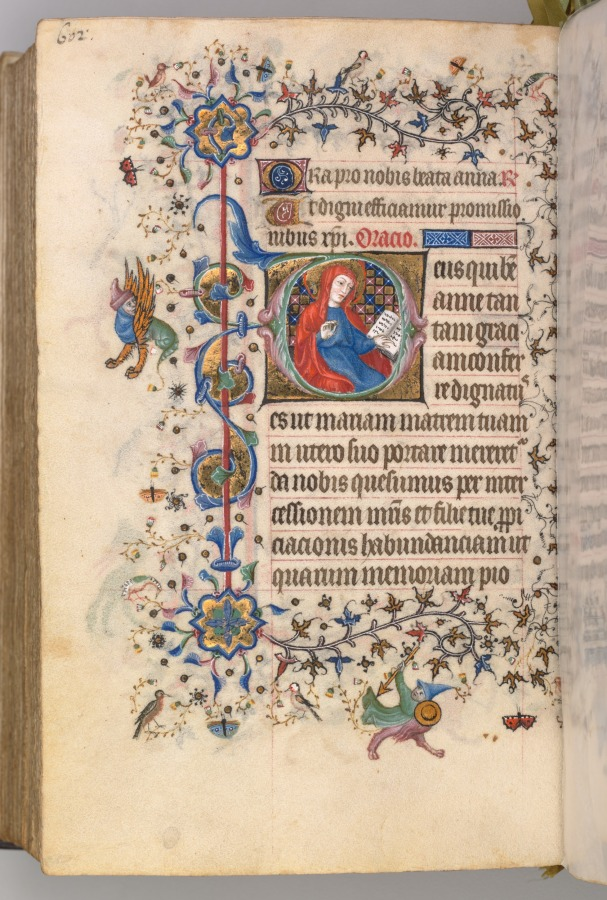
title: Hours of Charles the Noble, King of Navarre (1361-1425): fol. 295v, St. Anne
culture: France, Paris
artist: Master of the Brussels Initials and Associates (French)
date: c. 1405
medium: ink, tempera, and gold on vellum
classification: Bound Volume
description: This precious volume was obviously highly prized by its owner, the French-born King of Navarre, who had his coat of arms painted on no less than twenty folios. Rather than directly commissioning this manuscript from a specific workshop, it seems that Charles the Noble acquired his book of hours -- perhaps ready-made for the luxury market -- while on a trip to Paris in 1404-05. A collaborative effort, six painting styles are evidenced within the pages of this codex, those of two Italians, two Frenchmen, and two Netherlanders. The painter who was responsible for the planning and decoration of the book, and who produced seventeen of the large miniatures, was a Bolognese artist known as the Master of the Brussels Initials. His principal assistant, responsible for most of the borders, was a Florentine who signed his name "Zecho" da Firenze on folio 208 verso.